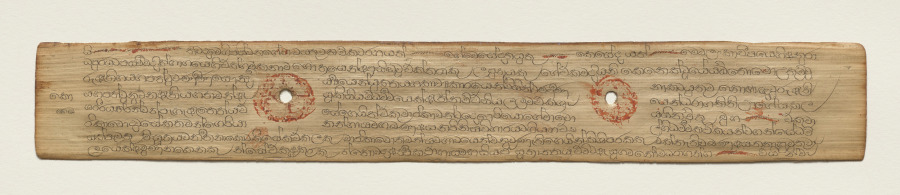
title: Leaf from a Buddhist Manuscript (recto)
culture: Sri Lanka, Singhalese, Late 17th century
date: c. 1700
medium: fiber paper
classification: Manuscript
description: Palm leaf material is still used for manuscripts in Sri Lanka. The palm leaves are prepared first by boiling them, drying them in the sun, and then rubbing them with oils. Scribes then use a metal stylus to incise the text. Then charcoal powder is wiped across the pages, filling in only the inscribed lines.